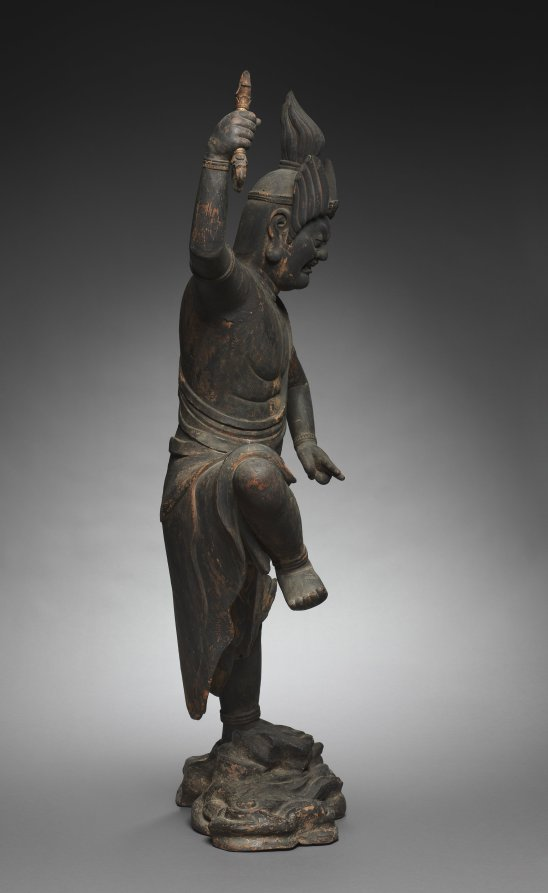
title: Zaō Gongen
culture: Japan, Kamakura period (1185–1333)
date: 1200s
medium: wood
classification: Sculpture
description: Zaō Gongen is the guardian deity of Mount Kinpu in Yoshino south of Nara. Zaō appeared at the behest of En no Gyōja, who prayed for a powerful protector of the mountain. The deity was described as a combined manifestation of the Buddha Shakyamuni, Thousand-Armed Kannon, and Miroku. These three deities were viewed as the past, present, and future protectors of the world. Zaō’s appearance derives from portrayals of fierce Buddhist deities.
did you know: Zaō Gongen wears the pelt of a large feline, the face of which is near his knee.